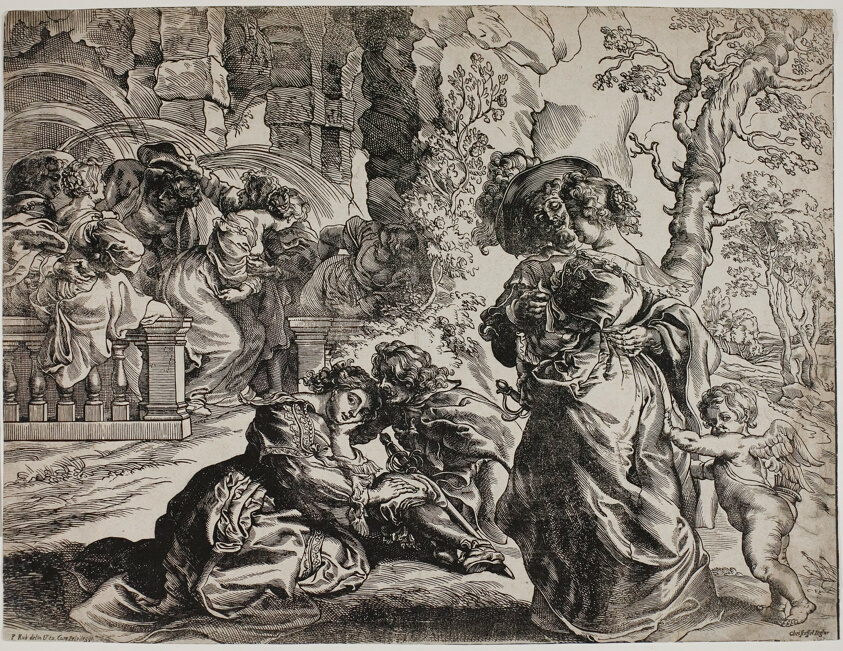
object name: Print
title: The Garden of Love, Right Half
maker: Christoffel Jegher; Flemish, 1596-1652/53; after Peter Paul Rubens; Flemish, 1577-1640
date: c. 1631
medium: Woodcut on ivory laid paper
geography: Germany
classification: woodcut; print; prints and drawing